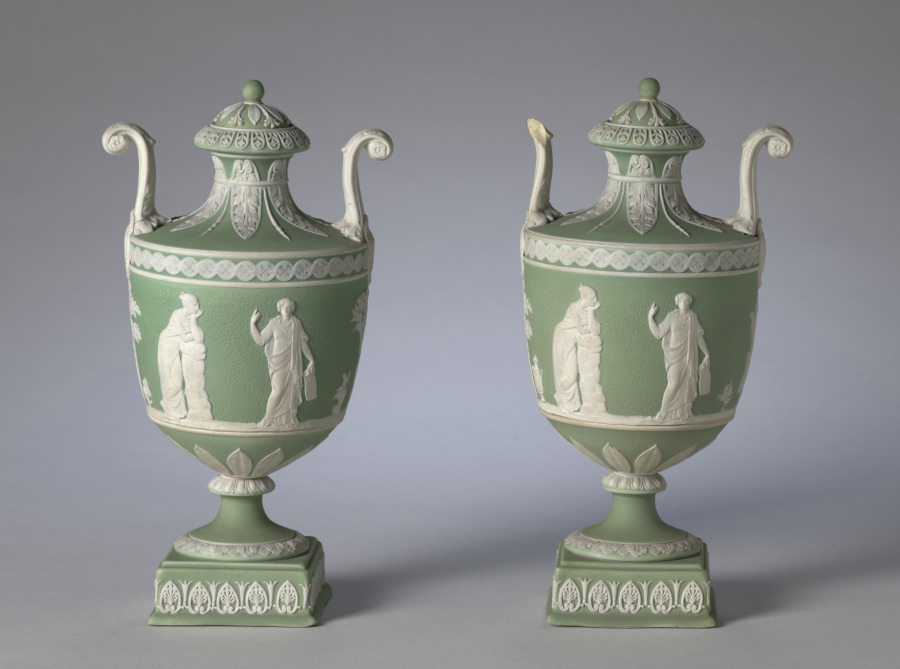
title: Pair of Covered Urns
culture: England, Staffordshire, late 18th-early 19th Century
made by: Wedgwood Factory (British)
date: c. 1800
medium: jasper ware with relief decoration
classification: Ceramic